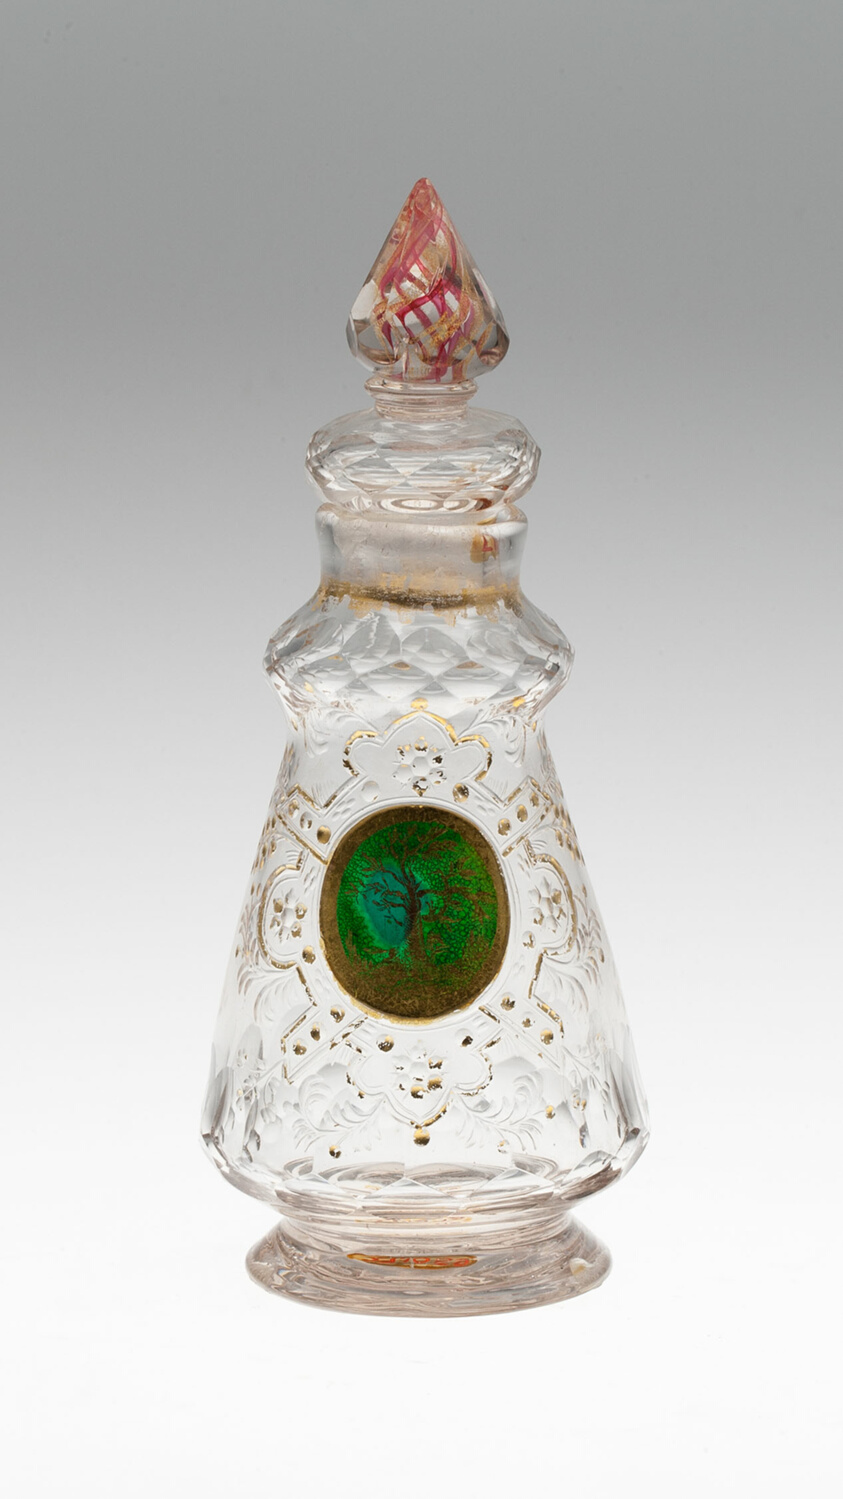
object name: Glass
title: Flask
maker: Bohemia, Czech Republic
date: c. 1730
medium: Glass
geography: Bohemia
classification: glass; european decorative arts